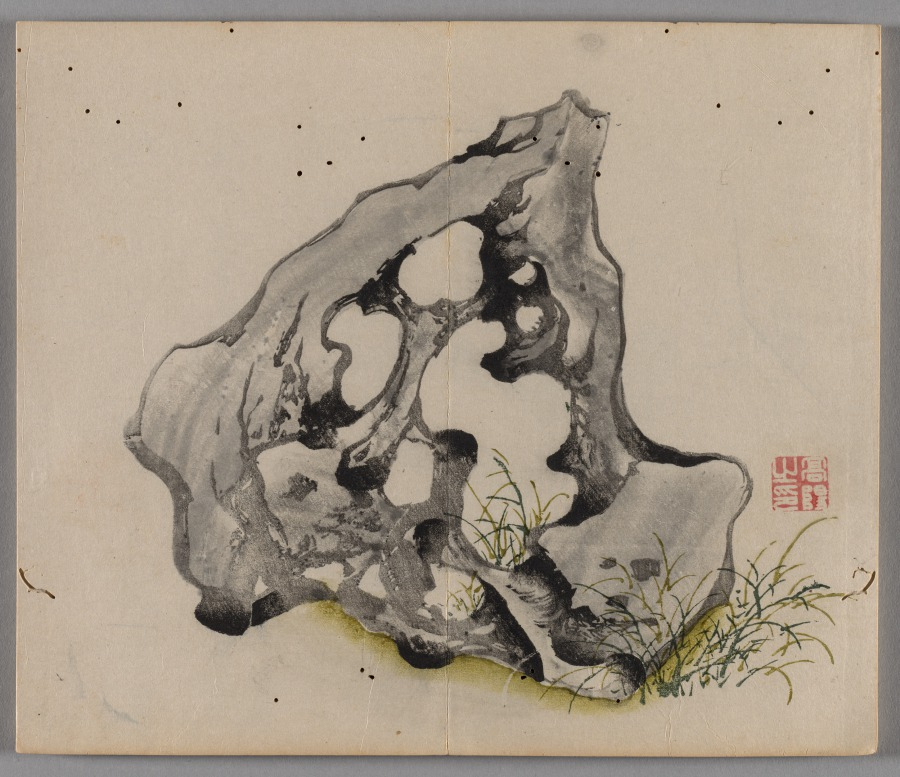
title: Ten Bamboo Studio Painting and Calligraphy Handbook (Shizhuzhai shuhua pu): Rocks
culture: China, Qing dynasty (1644-1911)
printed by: Hu Zhengyan (Chinese, c. 1584–1674)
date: 1633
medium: Woodblock-printed book; ink and colors on paper; first edition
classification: Print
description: Color printing reached a level of perfection in the early 1600s, as seen in this Ten Bamboo Studio Collection of Calligraphy and Painting and the Mustard Seed Garden Manual of Painting (printed 1679 and 1701). The painterly quality, precision in registering (aligning) the woodblocks, and harmonious colors made them the most successful color print editions in Chinese history. Both editions were printed and compiled in Nanjing, spread nationwide, and had a great impact on the arts in Japan and Korea.